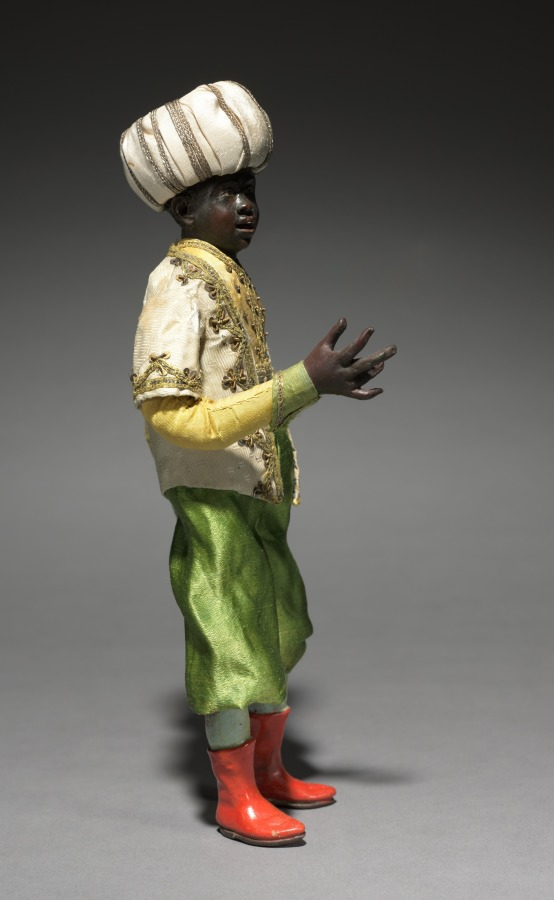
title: Figure from a Crèche: Attendant of the Magi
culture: Italy, Naples, late 18th-early 19th century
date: 1780–1830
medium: painted wood and terracotta with various textiles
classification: Sculpture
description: The practice of creating scenes of the Nativity for the home dates from the early 1700s in Italy, where people began to set up doll-like figures of about a foot or less in height. The custom was particularly popular in Naples around 1800, where crèche scenes (crèche means cradle, or crib) included many figures, whose heads and hands of painted terracotta, stuffed cloth bodies, and clothing adapted from contemporary local costumes gave them an amazingly realistic character. Representations of the birth of Jesus can be traced to the first few centuries of Christianity. Both living creatures and sculptural depictions of them were used from early times. By the late middle ages it was customary to create life-size figures of wood or stone, naturalistically painted, to represent the characters who participated in the events of Jesus's early life. These sculptures were then arranged in scenes illustrating one or both of the most important of these events, the Adoration of the Shepherds and the Adoration of the Magi-the three kings from the East who came to pay homage to the Christ child. Used in churches, these large figures were especially popular in Italy, Central Europe, Spain, and Portugal.